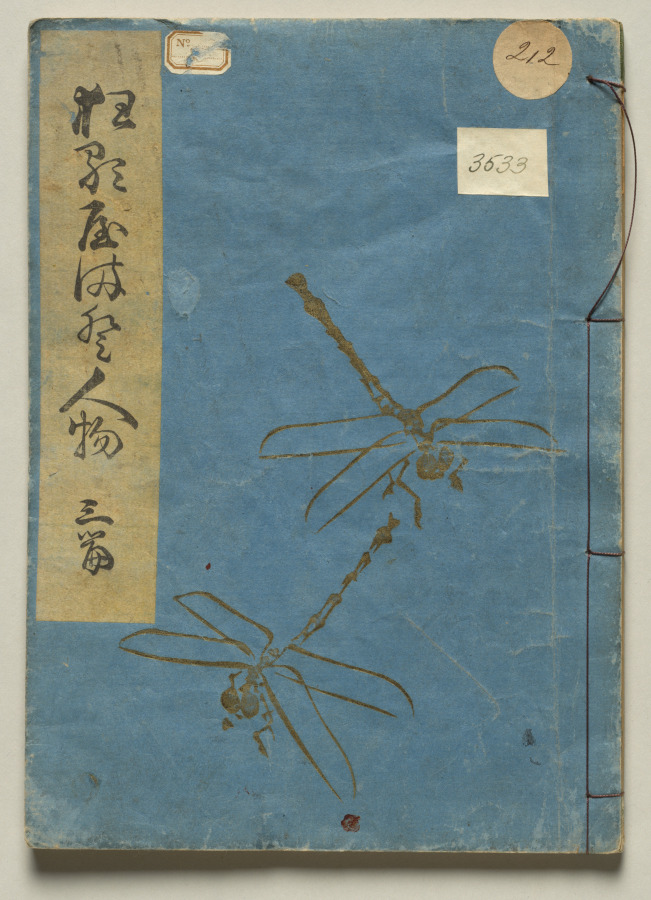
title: Volume Three of People of Japan in Light Verse (Kyōka)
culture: Japan, Edo period (1615–1868)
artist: Utagawa Hiroshige (Japanese, 1797–1858)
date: 1857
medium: Woodblock-printed book; ink and color on paper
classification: Bound Volume